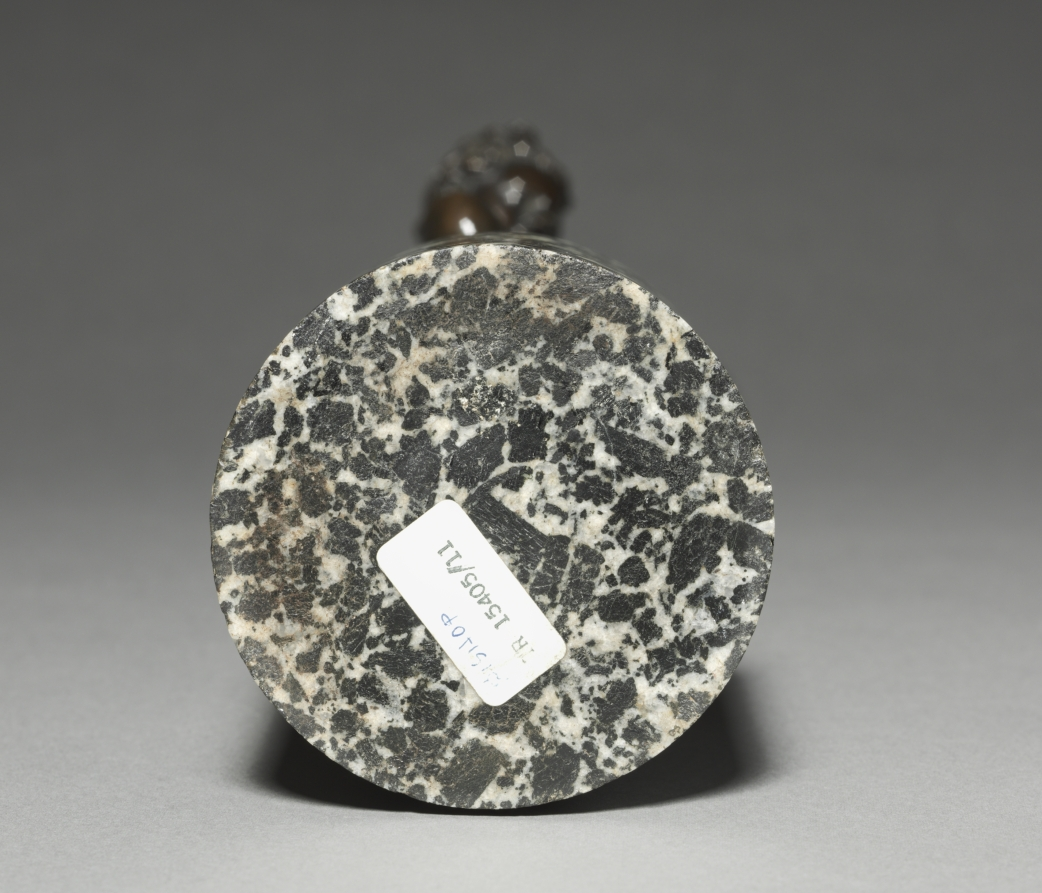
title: Venus after the Bath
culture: Italy, early 17th century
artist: cast possibly by the Workshop of Giambologna (Flemish, active Italy, 1529–1608)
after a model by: Giambologna (Flemish, active Italy, 1529–1608)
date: c. 1600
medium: bronze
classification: Sculpture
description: The statuette’s scale speaks to its likely place in private, intimate settings. The serpentine composition would have encouraged close examination from multiple angles. Compare the complexity of her pose to the relatively static Venus with a Burning Urn (1948.171).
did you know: Giambologna intended his bronze statuettes to be held and touched, to fully appreciate their smooth, elegant forms.